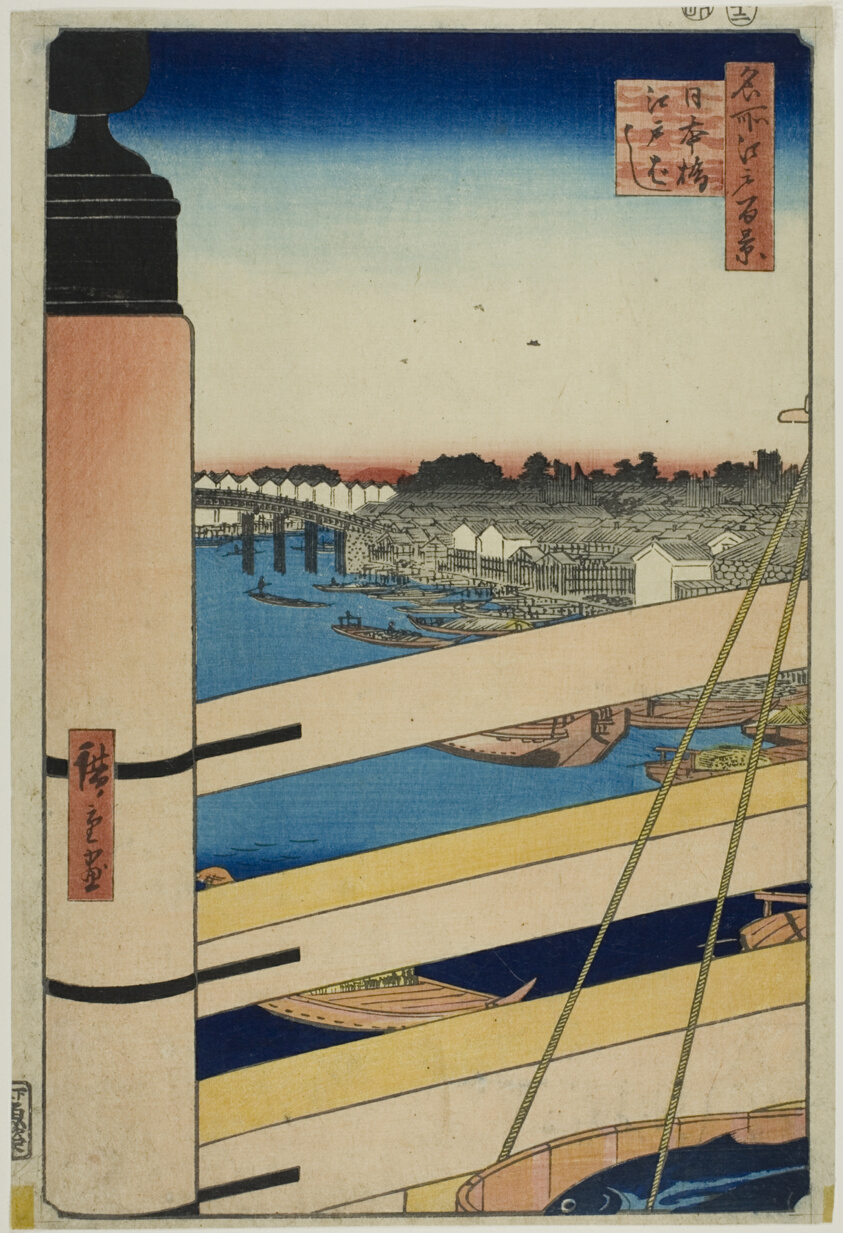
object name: Print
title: Nihon Bridge and Edo Bridge (Nihonbashi, Edobashi), from the series "One Hundred Famous Views of Edo (Meisho Edo hyakkei)"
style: Japanese (culture or style)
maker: Utagawa Hiroshige 歌川 広重; Japanese, 1797–1858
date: 1857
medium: Color woodblock print; oban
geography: Japan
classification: woodblock print; print